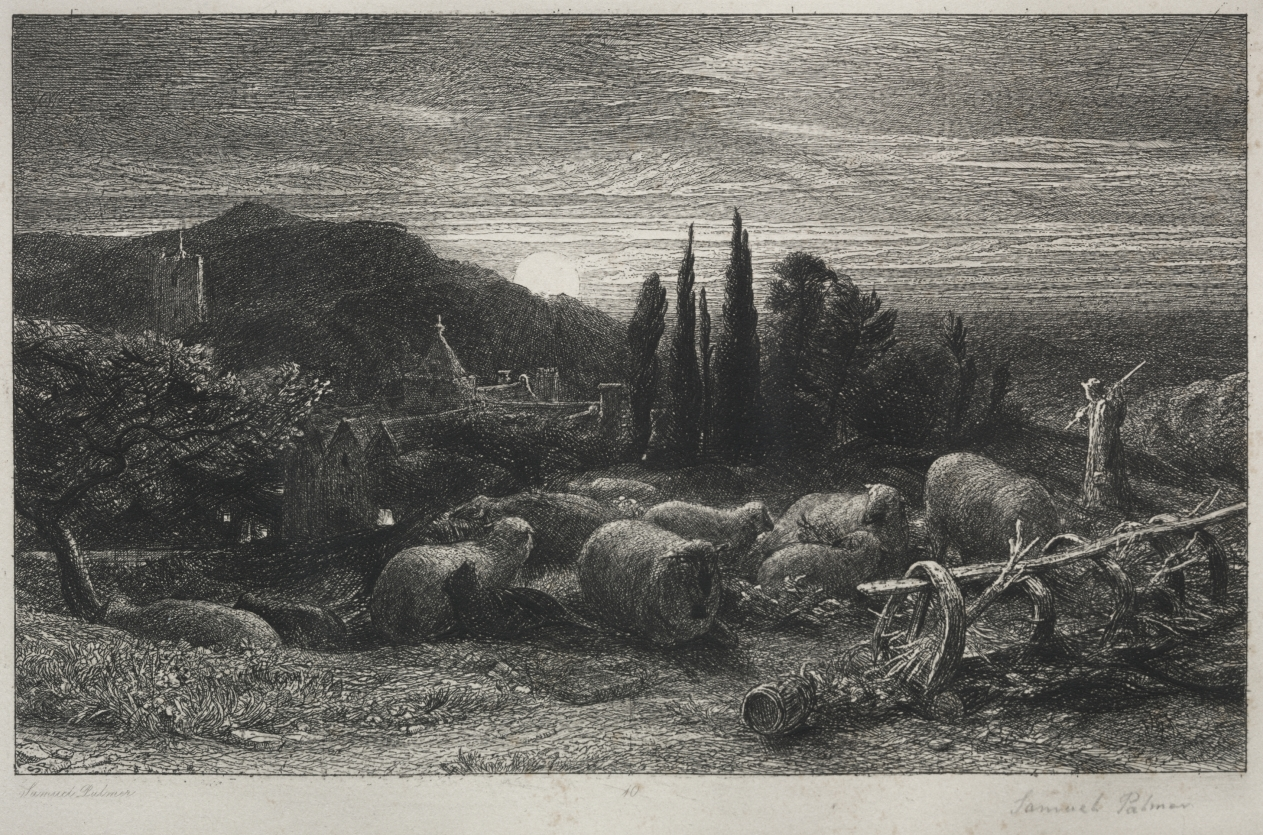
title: The Rising Moon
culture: England, 19th century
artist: Samuel Palmer (British, 1805–1881)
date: 1857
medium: etching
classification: Print